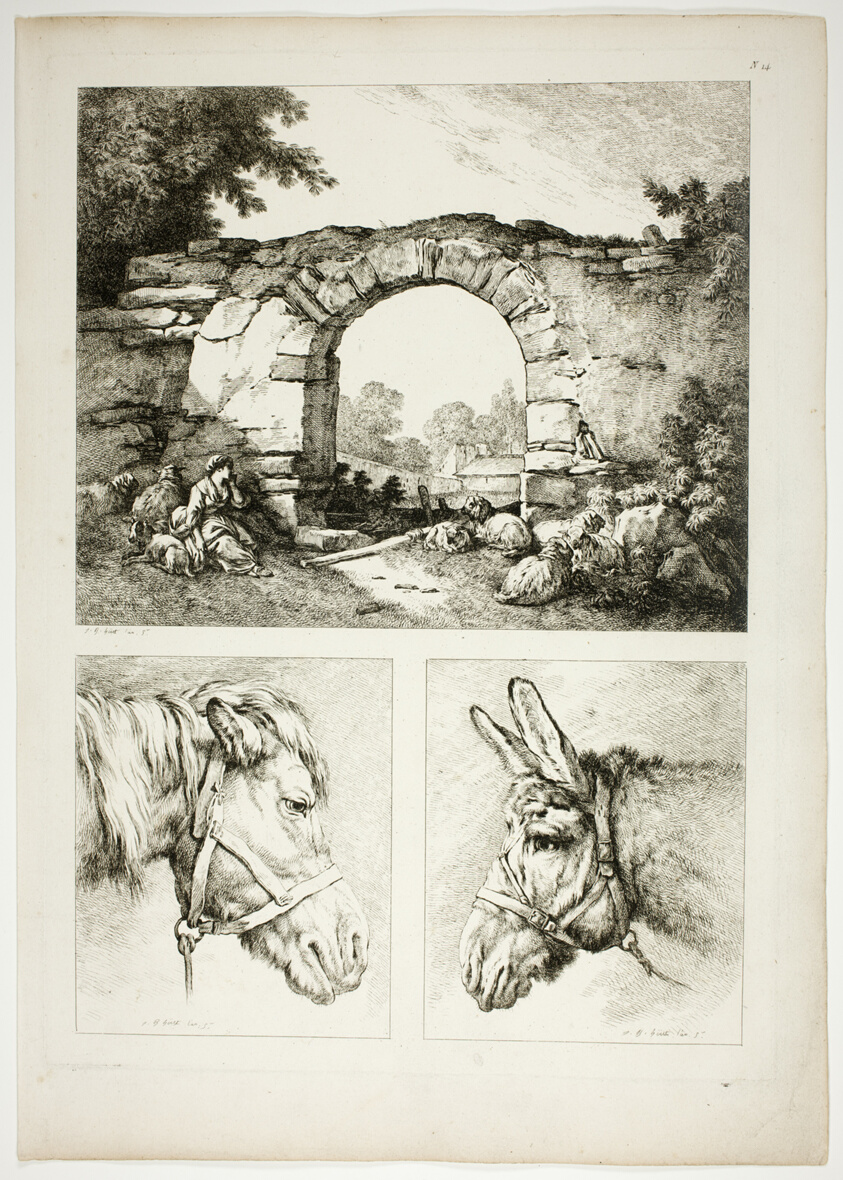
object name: Print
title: Plate Fourteen of 38 from Oeuvres de J. B. Huet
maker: Jean Baptiste Huet (French, 1745-1811)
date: 1796–99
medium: Etching on paper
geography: France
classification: etching; print; prints and drawing